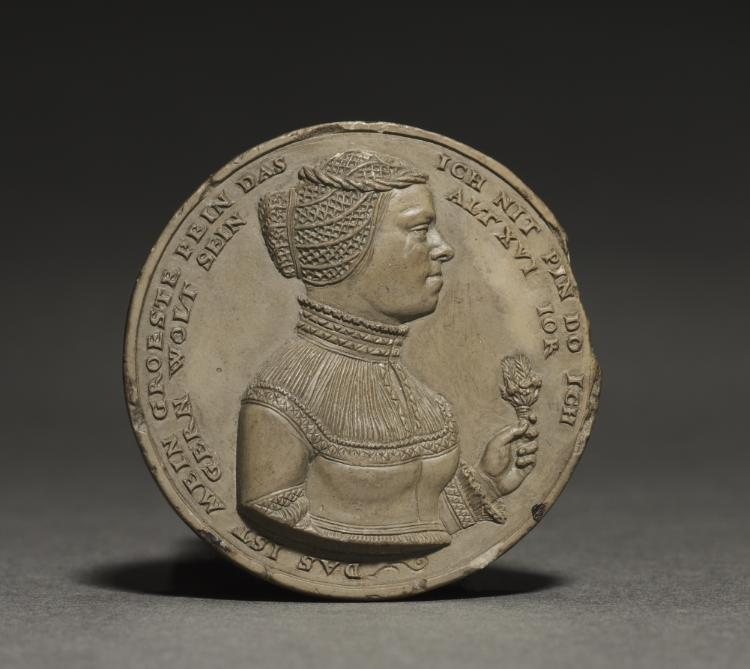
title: Portrait of a Woman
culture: Germany, Nuremberg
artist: Kilian Koch (German)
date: 1580–1600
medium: Kelheim stone (fine-grained limestone)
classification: Sculpture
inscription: inscription: DAS IST MEIN GROESTE PEIN DAS ICH NIT PIN DO ICH GERN WOLT SEIN ALT XVI IOR (It is my greatest sorrow that I am not, though I gladly would be, sixteen years old.)